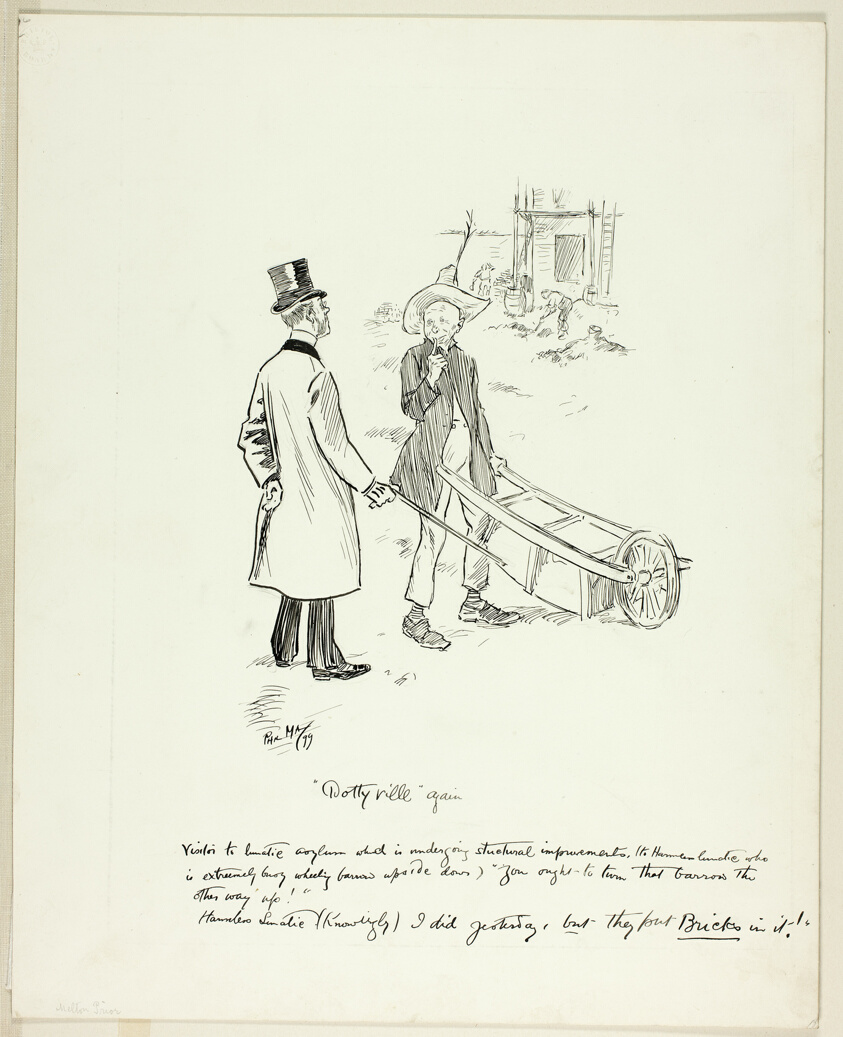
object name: Drawing and Watercolor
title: Dottyville Again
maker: Philipp William May; English, 1864-1903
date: 1899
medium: Pen and black ink over graphite on ivory wove card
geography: England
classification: pen and ink drawings; drawings (visual works); prints and drawing